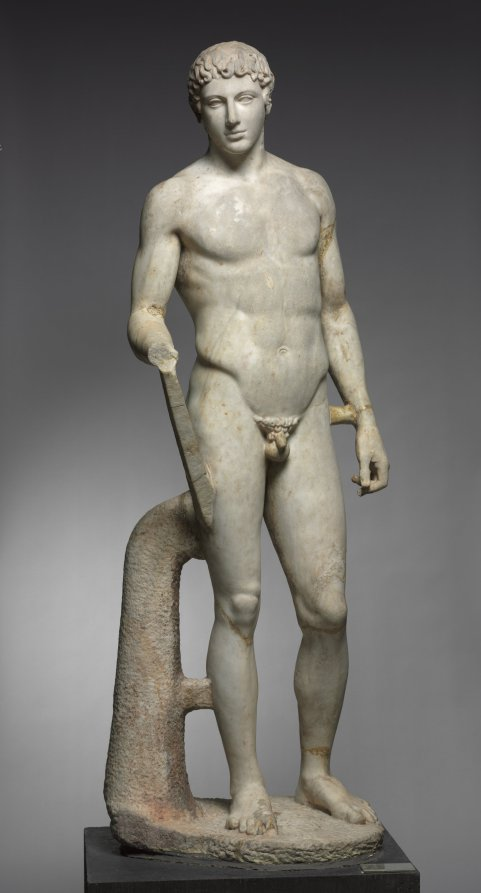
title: Statue of an Athlete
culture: Italy, Roman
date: 1–100 CE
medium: marble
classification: Sculpture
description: This idealized athlete recalls Greek sculptural types invented and popularized during the 400s BC. Large-scale athletes and other sculptures like this were originally created by famous artists as sanctuary dedications. Centuries later, they were widely copied and adapted by Roman sculptors, whose clients sought their own versions of earlier masterpieces. Working in marble rather than bronze, these sculptors added certain elements for stability, such as the struts and the large tree trunk beside the right leg here. Sculptures like this one are profoundly complex, made by and for Romans but descended from Greek ancestors.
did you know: For many years, this sculpture stood in the rotunda of the Cleveland Museum of Art.